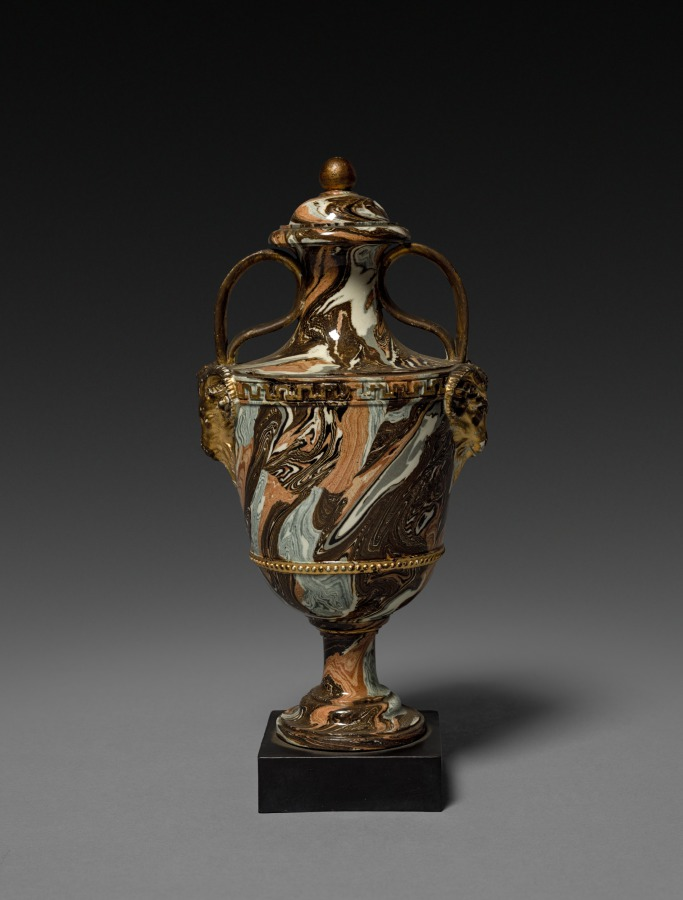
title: Urn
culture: England, late 18th or 19th century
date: late 1700s - 1800s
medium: earthenware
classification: Ceramic